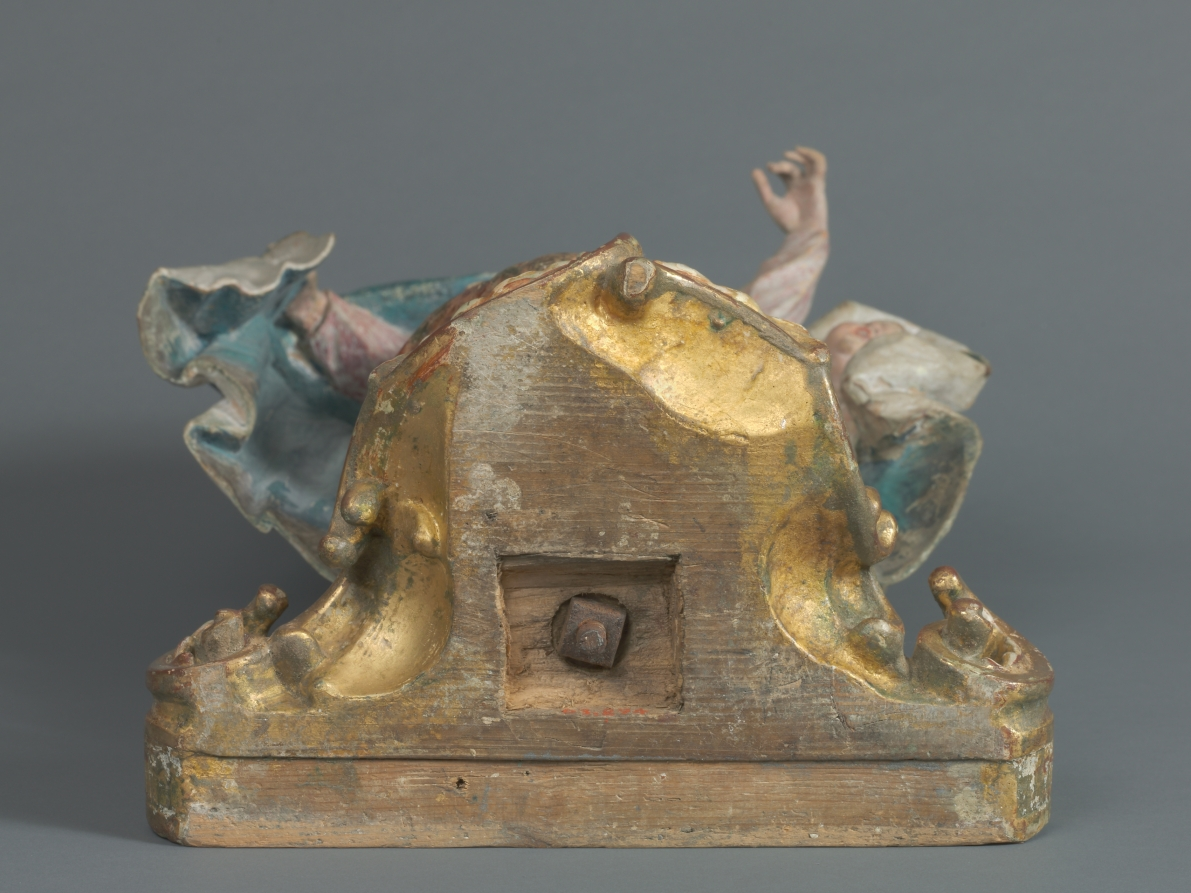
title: The Immaculate Conception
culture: Germany, Munich, 18th century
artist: Ignaz Günther (German, 1725–1775)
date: c. 1770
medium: painted and gilded wood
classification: Sculpture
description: The Christian doctrine of the Immaculate Conception maintains that the Virgin Mary was conceived free from sin, ready to be the pure vessel for Christ’s birth. Depicting such an abstract idea required specific imagery. The moon beneath the Virgin’s feet, for example, comes from the New Testament vision of Saint John the Evangelist (Revelation 12:1) of “a woman clothed with the sun, with the moon under her feet,” while the serpent upon which she treads symbolizes Christ’s triumph over original sin. With his characteristically delicate modeling, elongated proportions, and soft coloring, Ignaz Günther created an archetypal image of innocence on the cusp of womanhood.